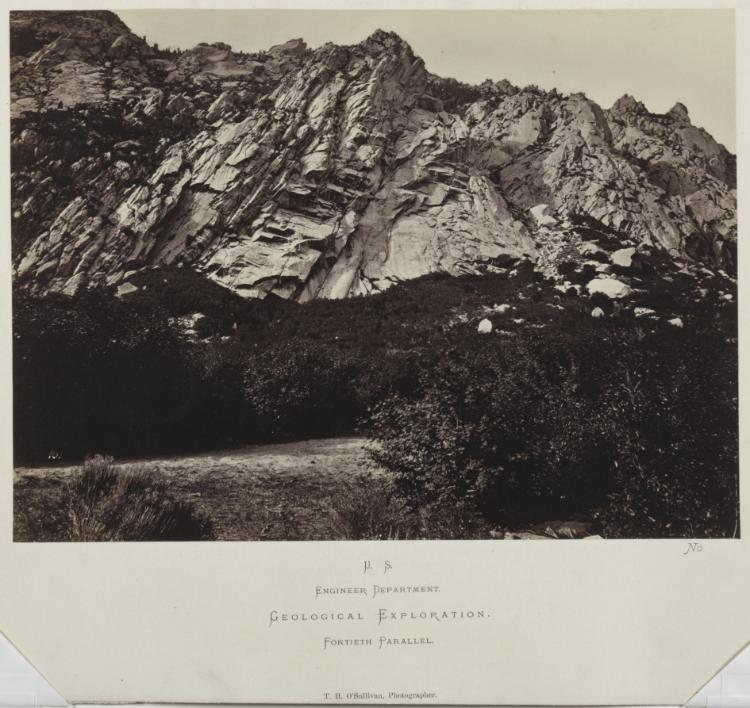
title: East Humboldt Mountains, Utah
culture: America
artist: Timothy H. O'Sullivan (American, 1840–1882)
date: 1868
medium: albumen print from wet collodion negative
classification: Photograph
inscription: Written on negative: "101"; in pencil on recto: "7.5"; in black ink on verso: "101"; "H-7";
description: By nature and by experience gained during the Civil War, O’Sullivan was ideally suited for the physical and creative demands required of the official photographer for the geological exploration of the fortieth parallel, led by the enterprising Yale geologist Clarence King. The goal of the expedition was to survey the geological structure and natural resources of a swath of territory 100 miles wide, from the eastern slopes of the Sierra Nevada Mountains across the Great Basin to the Rocky Mountains. While on the expedition in 1867–69 and 1872, O’Sullivan simultaneously pursued his own interest in perfecting a balanced, aesthetic style of landscape photography while providing a faithful record of the natural terrain. As typified in this print, he positioned the camera at a distance parallel to the majestic scenery, presenting a shallow, flattened depiction of space. The image describes in sharp detail the sheer beauty and rugged scale of this Western landscape.